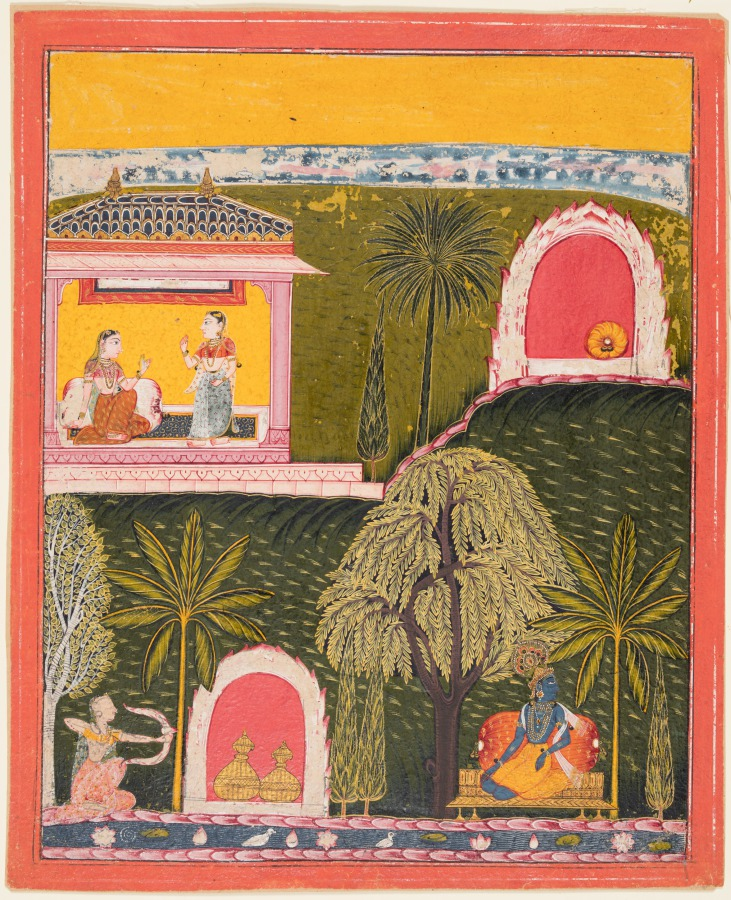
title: Rati, the Goddess of Erotic Love, Takes Aim at Krishna, from a Rasikapriya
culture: Northwestern India, Rajasthan, Rajput Kingdom of Raghogarh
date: c. 1660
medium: Gum tempera and gold on paper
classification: Painting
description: In a brightly lit chamber, the heroine (nayika) confers with her confidante (sakhi), perhaps to convey a message to Krishna, who sits in a grove near a lotus pond at the lower right. In the lower left corner, Rati shoots a flower arrow at Krisha to smite him with love for the nayika. The empty bower in the upper right awaits the lovers’ tryst.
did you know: Most of the white pigment has flaked off of this painting.